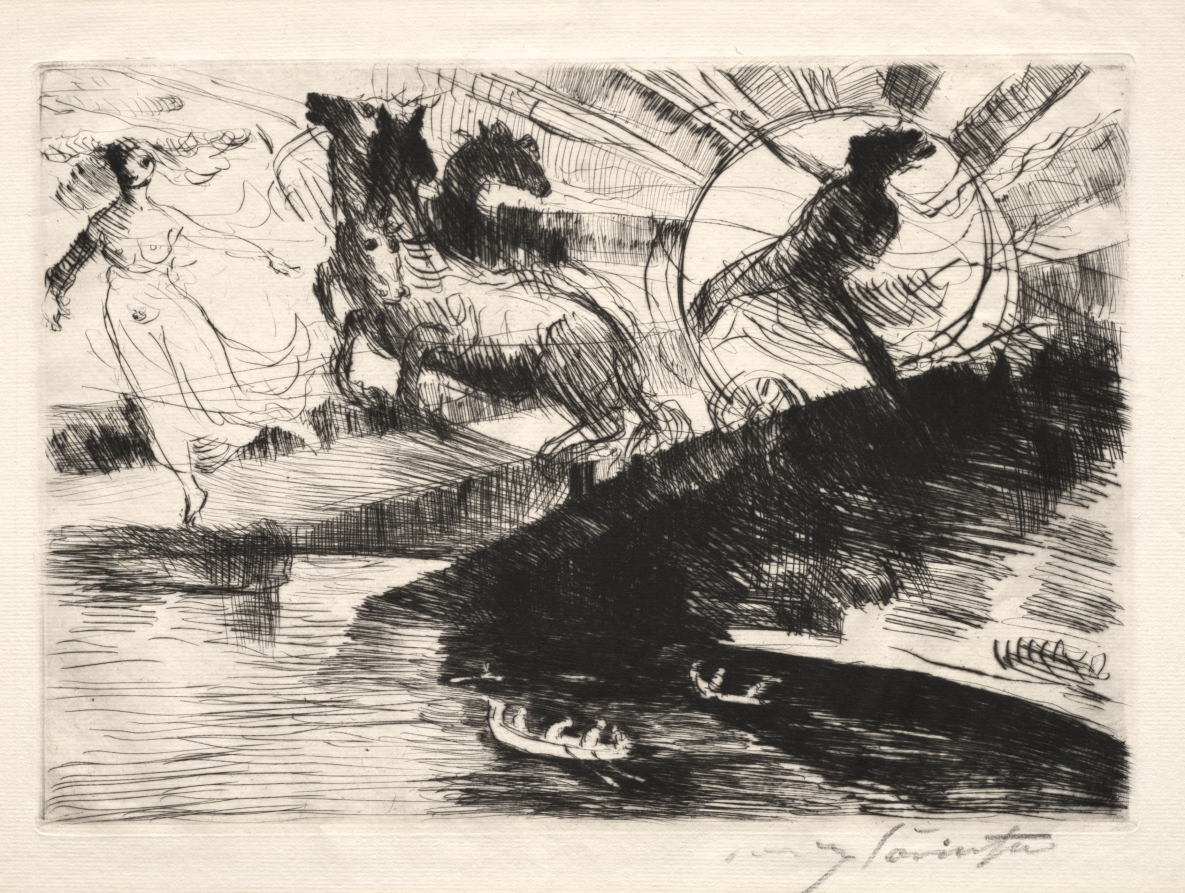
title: Helios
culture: Germany, 20th century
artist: Lovis Corinth (German, 1858–1925)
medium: drypoint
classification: Print